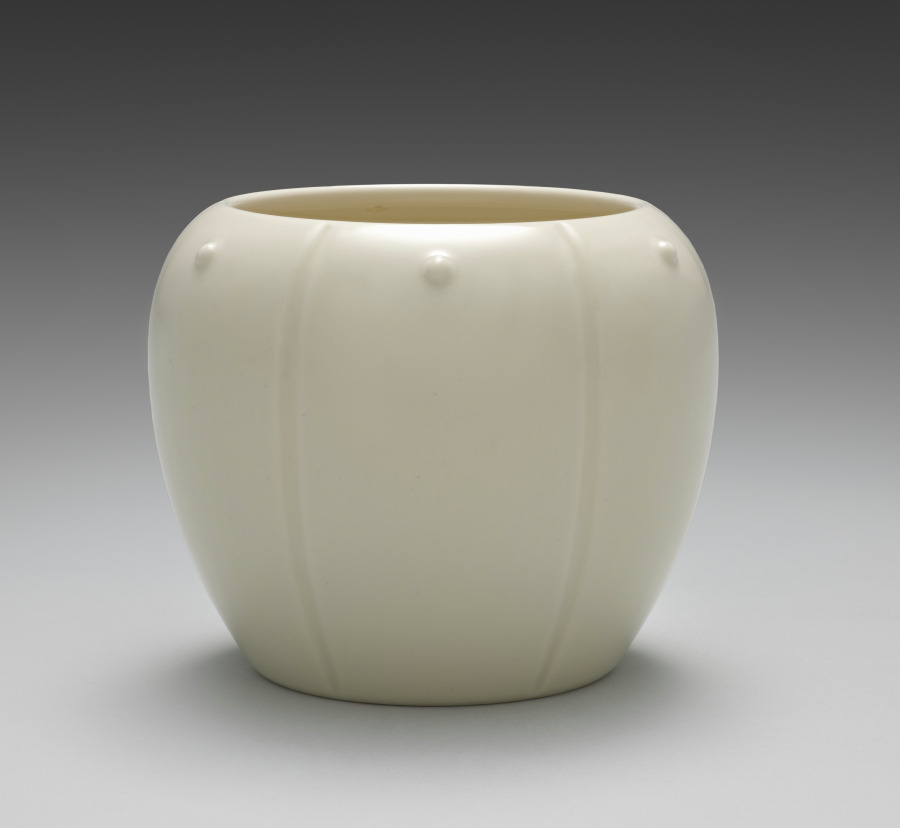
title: Container from Lit Charcoal and Ash Containers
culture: Japan, Meiji period (1868–1912)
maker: Seifū Yohei III (Japanese, 1851–1914)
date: 1893–1914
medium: One from a set of four containers; porcelain with molded design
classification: Ceramic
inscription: 清風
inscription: The storage box for this set is inscribed and impressed with seals.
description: The box lid for these six-lobed lit charcoal and ash containers, or hiire, identifies them as kōhakuji, another of Yohei III’s translucent cream colors over ivory clay bodies. One might translate the name as “lustrous pearl[–glazed ivory] porcelain.” A hiire was filled with ash with burnt coals at the center so that embers and tobacco ash could be discarded safely during a gathering. Each of the lobes on the containers has a round protrusion set below the rim. The studlike pattern is called ruiza. The term is also used to describe the pattern that rings the shoulder of some flower vases or metal kettles used in chanoyu.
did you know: The Seifu studio generally followed the standard practice in Japan for identifying the artist and object in box inscriptions.